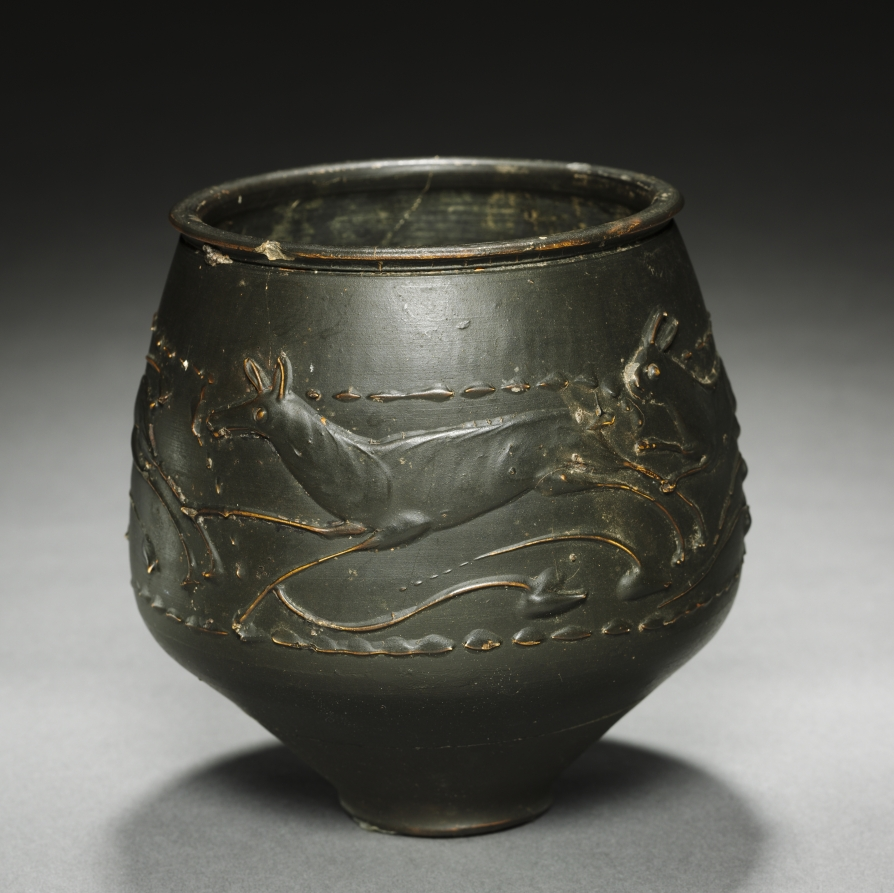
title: "Caster Ware" Vase with Hunt Scene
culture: Rhenish (Cologne), Gallo-Roman, mid-2nd Century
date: mid-100s CE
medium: reddish ware with black burnished slip and Barbotine decoration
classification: Ceramic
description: The wide body of this vase is decorated with a hunting scene in which a stag, doe, hare, and hound chase each other around the vessel. Dotted lines above and below the animals form a border around the scene, though the heads of the creatures occasionally poke above it. While larger barbotine decorations were usually mold made and applied to a leather-hard surface, the figures on our pot were piped on by hand.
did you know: “Hunt cups” like this one were a specialty of artisans working in Roman Cologne during the 2nd century CE.